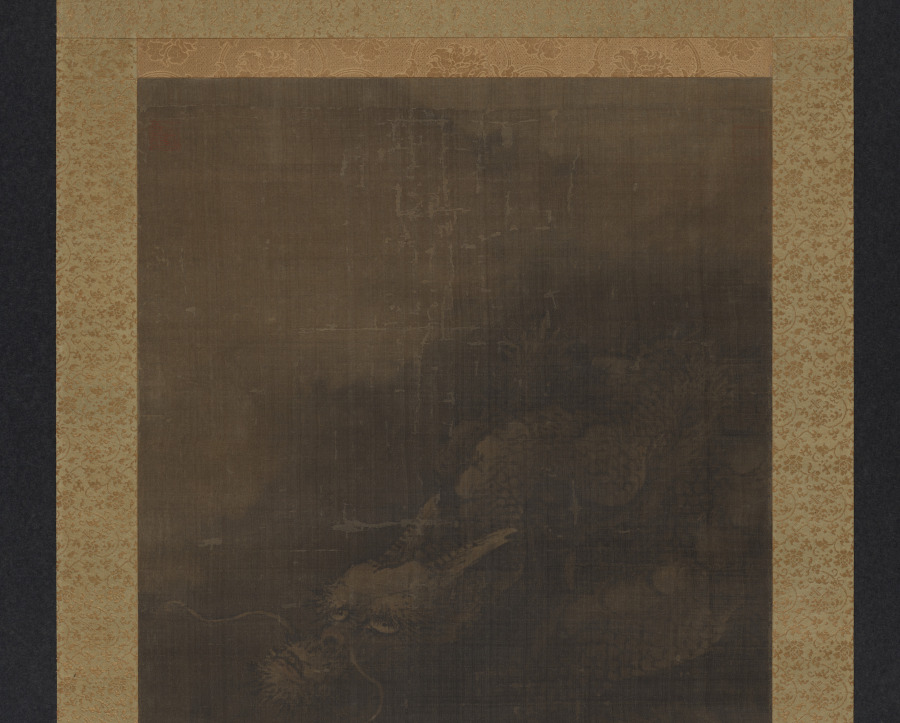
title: Dragon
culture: China, Southern Song dynasty (1127-1279)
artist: Fachang Muqi (Chinese, 1220–1280)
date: c. 1250–79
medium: Hanging scroll; ink on silk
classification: Painting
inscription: 道有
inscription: 雜華室印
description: The dragon and tiger are tied to the philosophical concept of yin and yang, which describes opposite but complementary forces. The dragon occupies a tiered background of waves and mist. Its luminous head emerges from the darker passages, and its narrow twisting body is serpent-like. By contrast, the close-up view of the tiger emphasizes its bulk. The tiger bends its head to lick its paw while its tail curls in the foreground. In their original Chan Buddhist context, this pair of scrolls likely flanked a central image, like the Bodhisattva Guanyin. The silk has darkened over the centuries, and the slight reddish shading in the tiger’s tongue and nose has faded.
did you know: Fachang Muqi was a Chinese Chan Buddhist monk and painter.